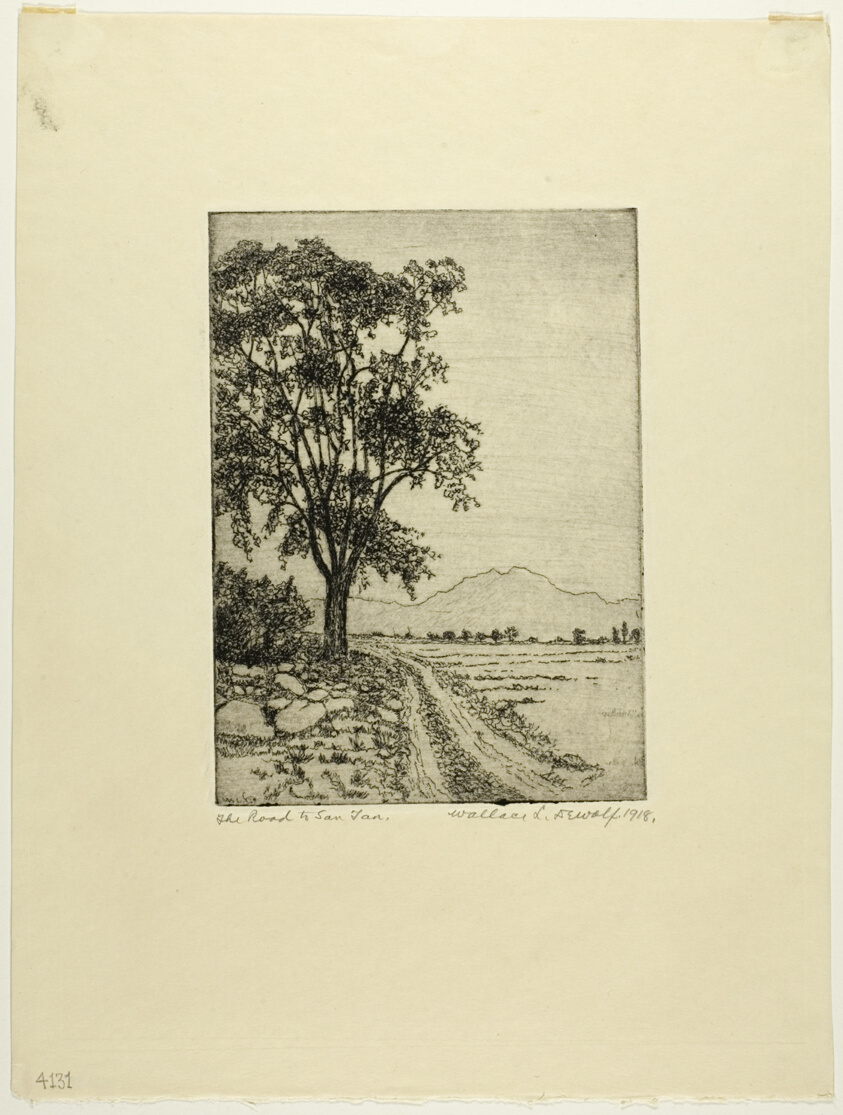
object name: Print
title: The Road to San Tan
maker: Wallace L. DeWolf (American, 1854-1930)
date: 1918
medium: Etching on cream wove paper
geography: United States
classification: etching; print; prints and drawing